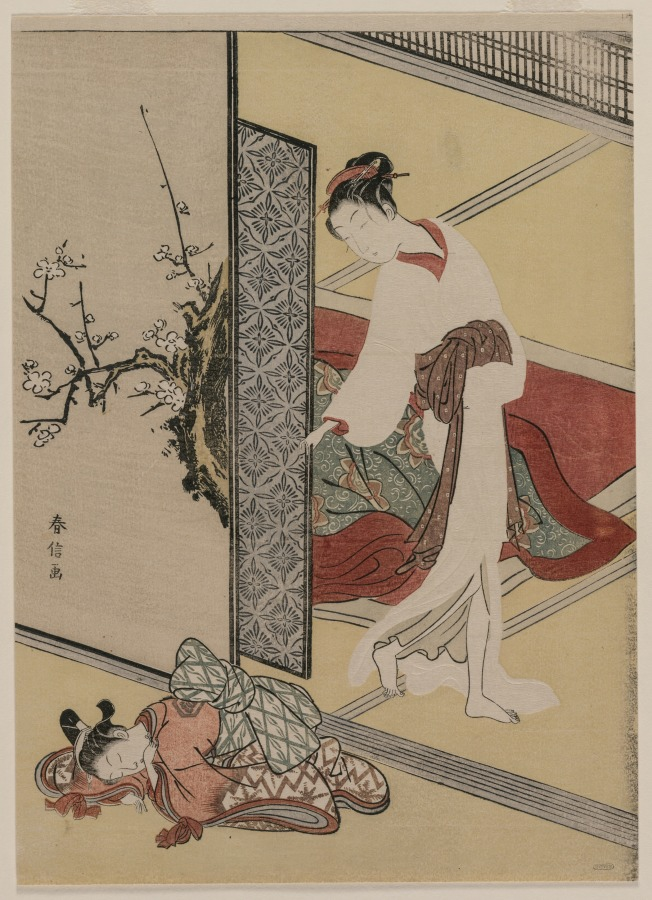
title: Courtesan and Sleeping Attendant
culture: Japan, Edo period (1615–1868)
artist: Suzuki Harunobu (Japanese, 1724–1770)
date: late 1760s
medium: color woodblock print, with embossing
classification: Print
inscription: Artist's signature: Harunobu ga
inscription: Collector's seal: Vever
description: In this print, a courtesan emerges from her bed to find her attendant asleep. As was customary, the courtesan has her obi sash tied at the front, while her servant has hers tied at the back. The strong contrast between the colorful bedclothes and the white of the courtesan’s robe is heightened by the embossing of the fabric folds, lending a three-dimensional effect to her form. The technique involves pressing a carved but unpigmented woodblock against the print surface.